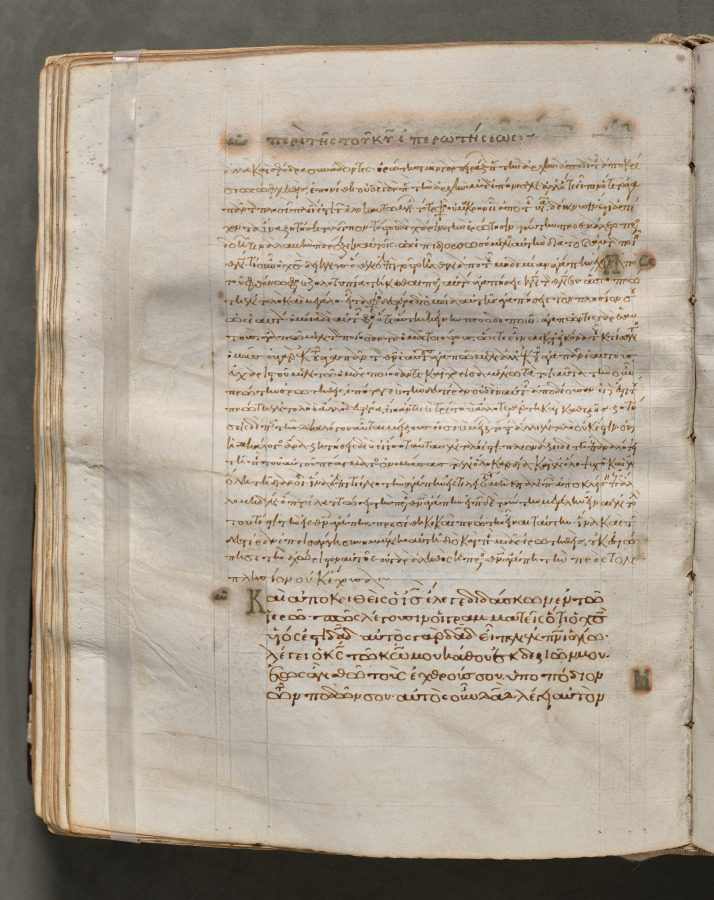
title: Text, folio 179 (verso), from a Gospel Book with Commentaries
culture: Byzantium, Constantinople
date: c. 1000–1100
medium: ink, tempera, and gold on vellum; leather binding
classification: Bound Volume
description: Each of the four gospels in this book opens on a page with brilliantly illuminated borders depicting the author of the text as well as birds-principally peacocks, symbols of the immortality of the soul-and fountains, representing the fountain of life and the salvation of the soul. This volume consists of 428 leaves with texts in Greek. Its level of sophistication suggests that it was probably written and decorated in a monastery in Constantinople.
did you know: Gospel Books were carried in procession through Byzantine churches.